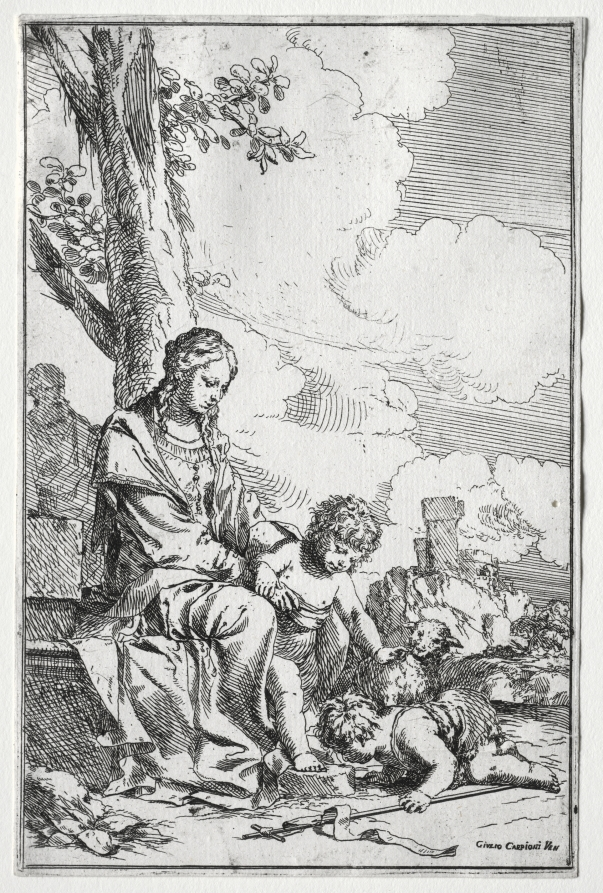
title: Holy Family with the Infant St. John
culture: Italy, 17th century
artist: Giulio I Carpioni (Italian, 1611–1674)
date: 1640–60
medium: etching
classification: Print